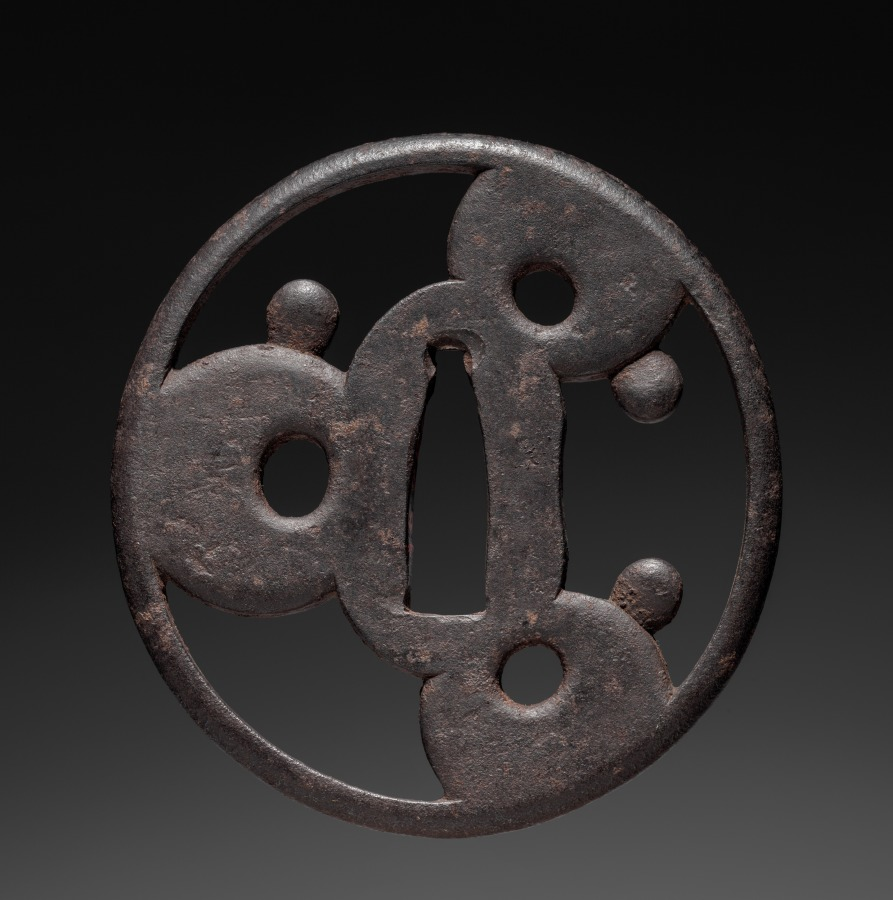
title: Sword Guard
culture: Japan, Edo period (1615–1868)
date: early 1800s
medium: iron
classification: Arms and Armor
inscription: Signature: Akao, residing at Kofu (Edo), made.